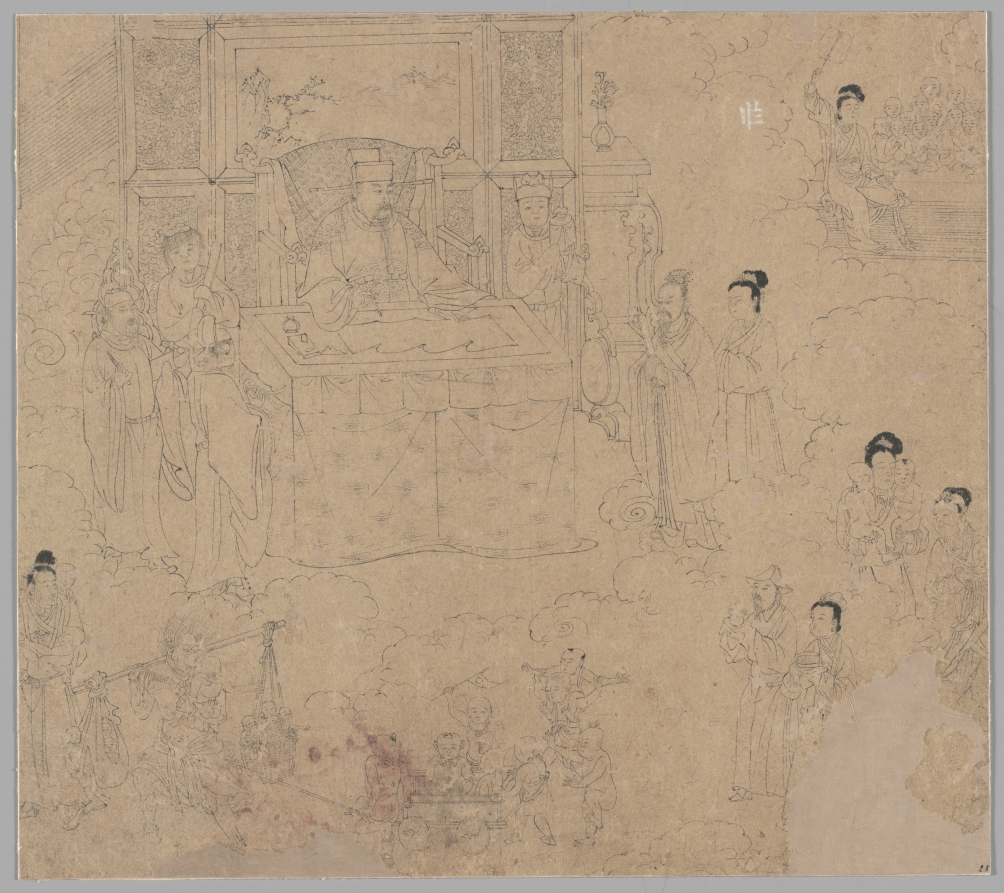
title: Album of Daoist and Buddhist Themes: Kings of Hells: Leaf 28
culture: China, Southern Song dynasty (1127-1279)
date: 1200s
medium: Album, ink on paper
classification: Painting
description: This extraordinary album has 50 paintings on a variety of religious subjects. They were likely created by several master craftsmen to share with studio apprentices as models for fulfilling commissions. The Jade Emperor and the Daoist pantheon make up the first 26 leaves. The next 14 leaves portray the Buddhist Ten Kings of Hell administering punishments to the dead. The third section, called “Clearing the Mountains,” features divine soldiers, led presumably by the deity Erlang Shen 二郎神, fighting undesirable creatures.